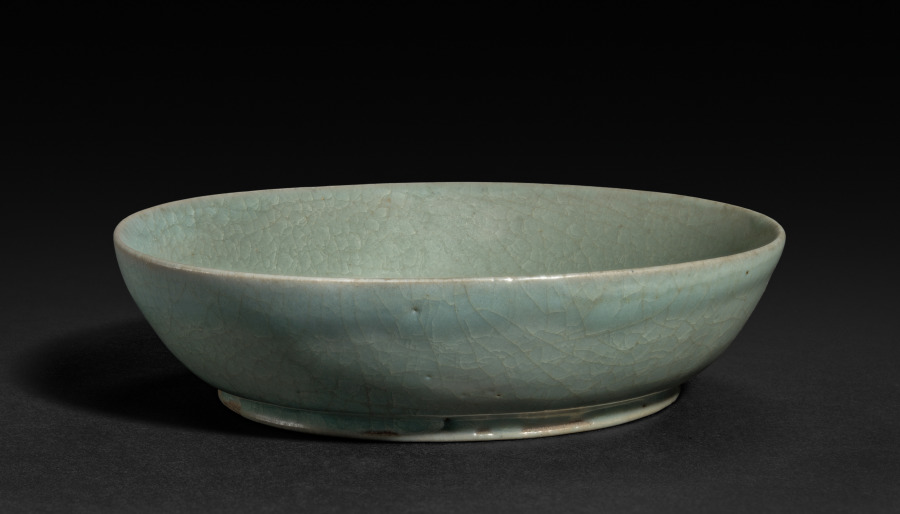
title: Brush Washer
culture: China, Henan Province, Baofeng, Qingliangsi, Northern Song dynasty (960-1127)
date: late 1000s–1127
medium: porcelaneous stoneware, Ru ware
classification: Ceramic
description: Ru ware is the rarest and most celebrated of all Chinese imperial wares. It was made for the late Northern Song court for a very short time and was therefore extremely rare and precious. Simplicity and refined elegance are Ru ware's hallmarks. Its graceful shape, soft luster, and subtle color variation of the glaze interact in perfect unity. Other physical characteristics include an ash-grey body, soft greyblue glaze with a fine crackle, as well as small sesame-seed spur marks on the base.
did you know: The little black spot in the glaze inside the dish is one of the slight imperfections characteristic of genuine Ru ware.